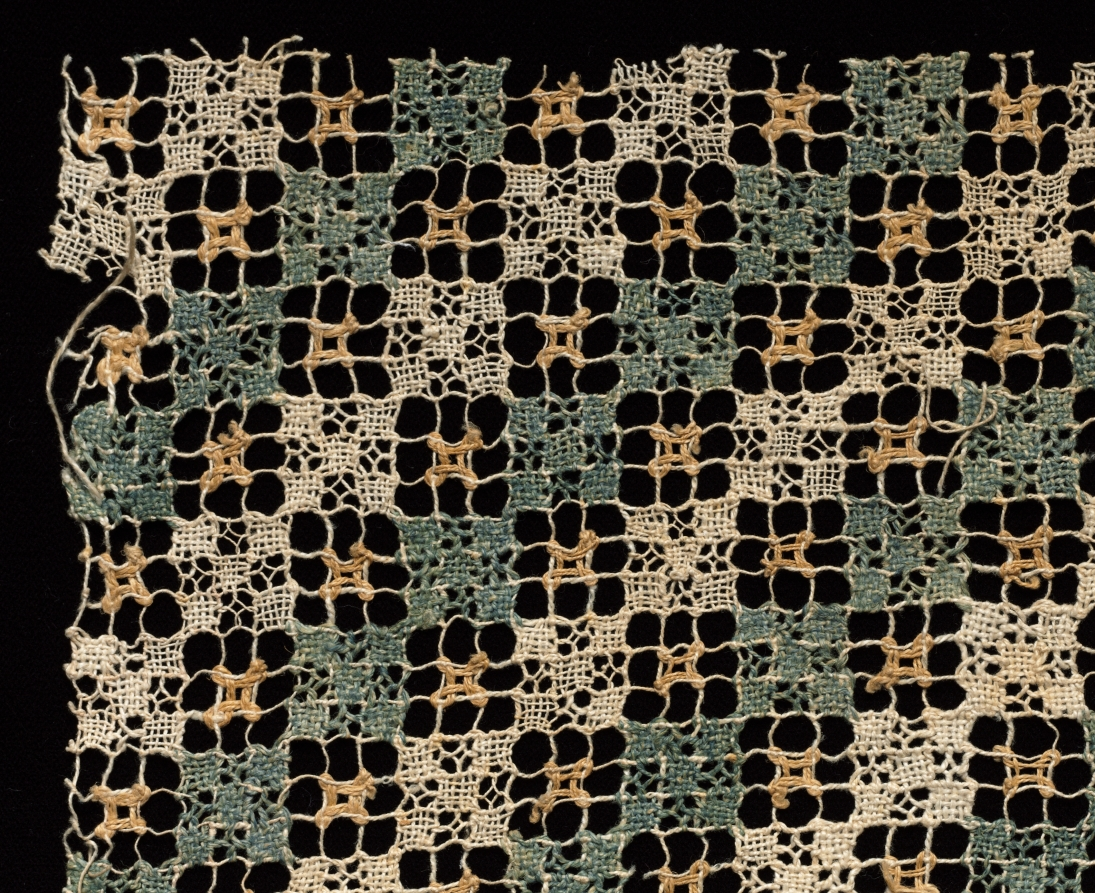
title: Fragment with Repeated Square Pattern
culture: Italy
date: 1500s–1600s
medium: Bleached, dyed, and unbleached linen (est.): needle lace; filet/lacis (knotted ground and darned in two directions)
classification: Lace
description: The prominent colors on this fragment of lace also determine the diagonal and square patterns within the textile. The dark yellow is unbleached linen, the white is bleached linen, and the blue is linen that has been bleached and dyed.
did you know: The word lace derives from the Latin laqueus, meaning noose.